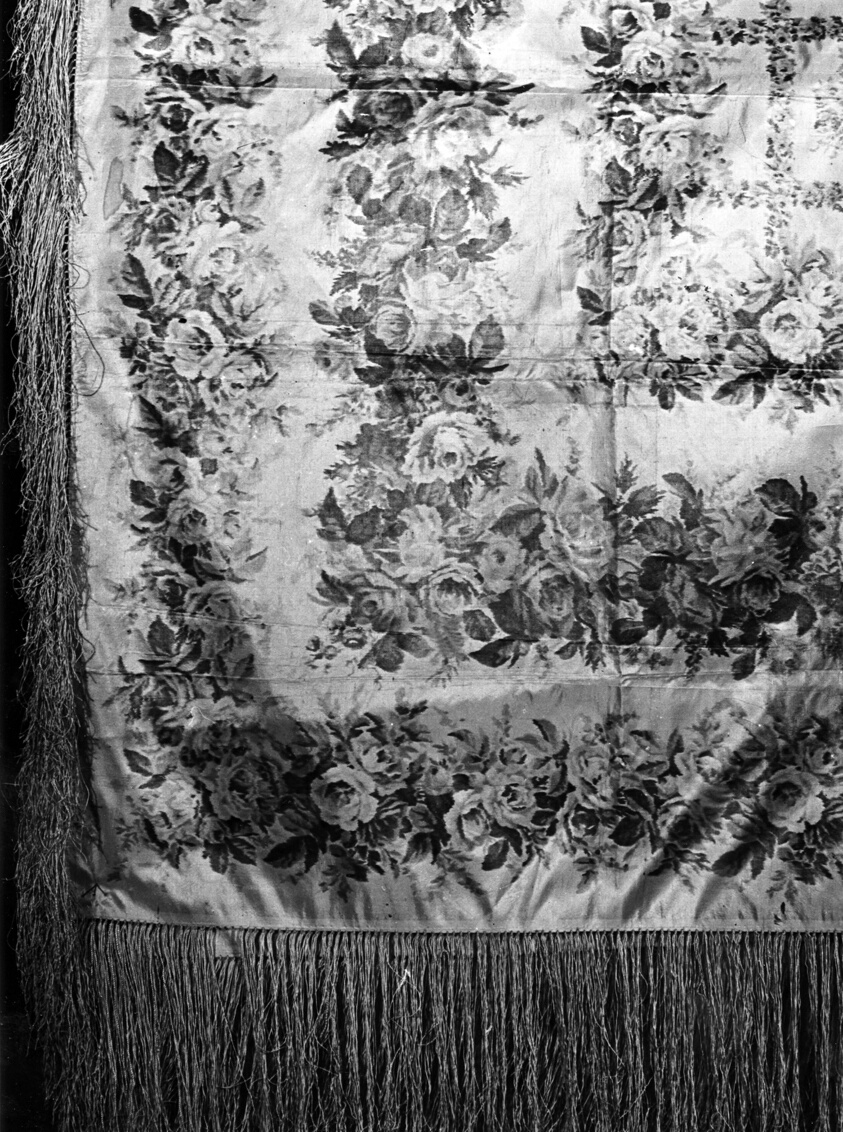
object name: Costume and Accessories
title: Shawl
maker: France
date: c. 1855/60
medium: Silk; painted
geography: France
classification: textile; costume; weaving; weaving - printed; dress (garment); clothing